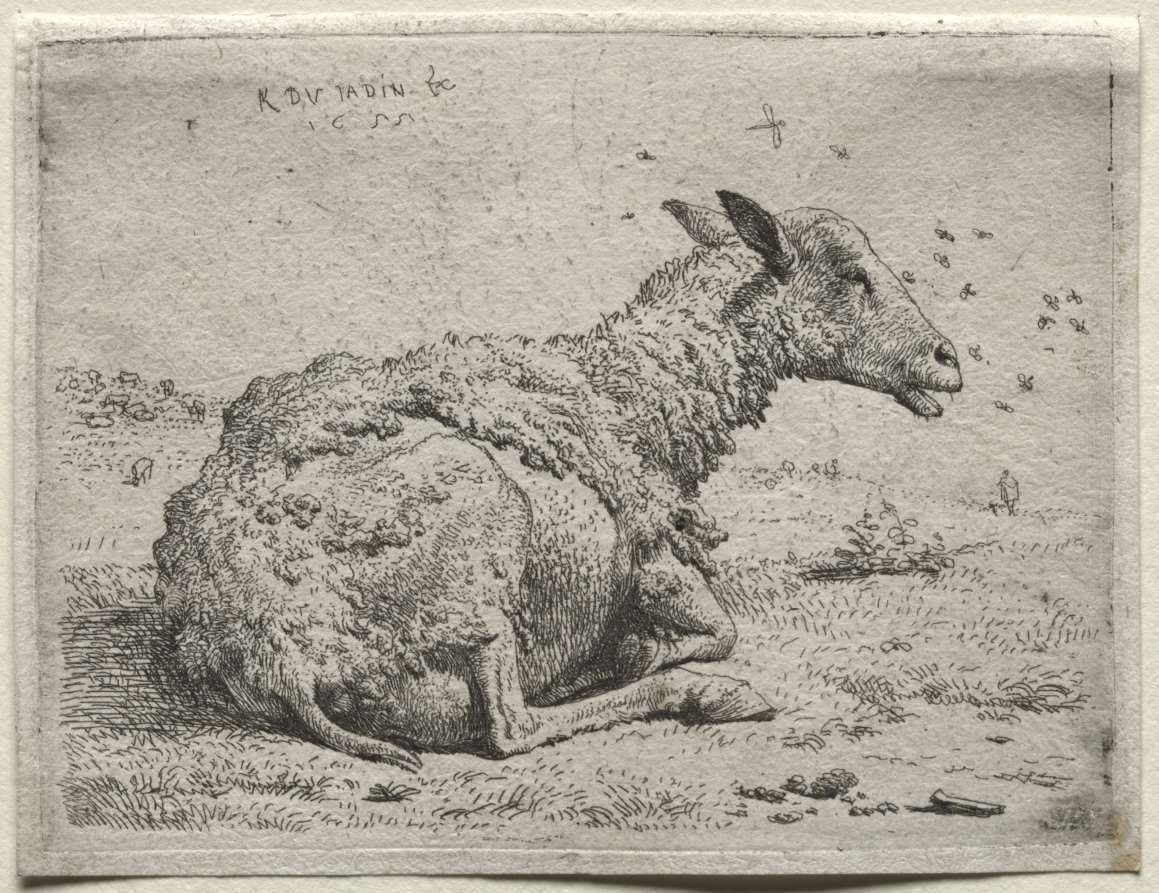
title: The Sheep and the Flies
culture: France, 17th century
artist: Karel Dujardin (Dutch, c. 1622–1678)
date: 1655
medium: etching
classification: Print